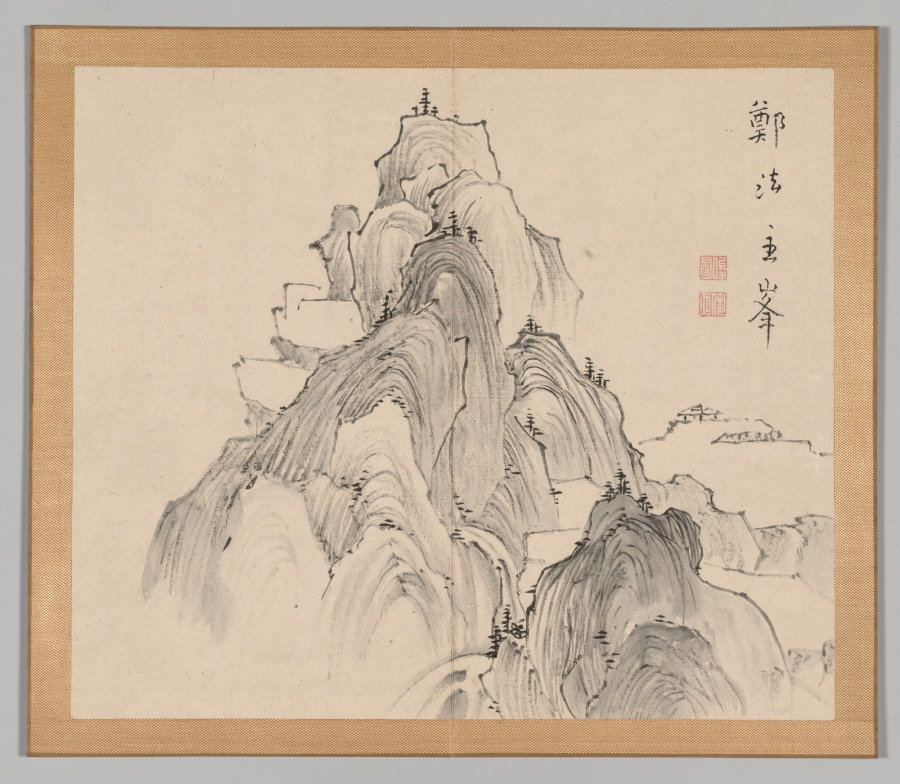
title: Reverberations of Taiga, Volume 2 (leaf 2)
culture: Japan, Edo period (1615–1868)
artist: Aoki Shukuya (Japanese, d. 1802)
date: mid- to late 1700s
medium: double-leaf from a pair of albums; ink and light color on paper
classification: Portfolio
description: Traditionally, young painters in Japan began their studies with an established master-painter. The master's compositions invariably became models that the apprentice copied to learn various ink and brush techniques. Shukuya was a pupil of the famous Kyoto artist Ikeno Taiga, whose style is reflected in these sketches of rocks, trees, and mountains.